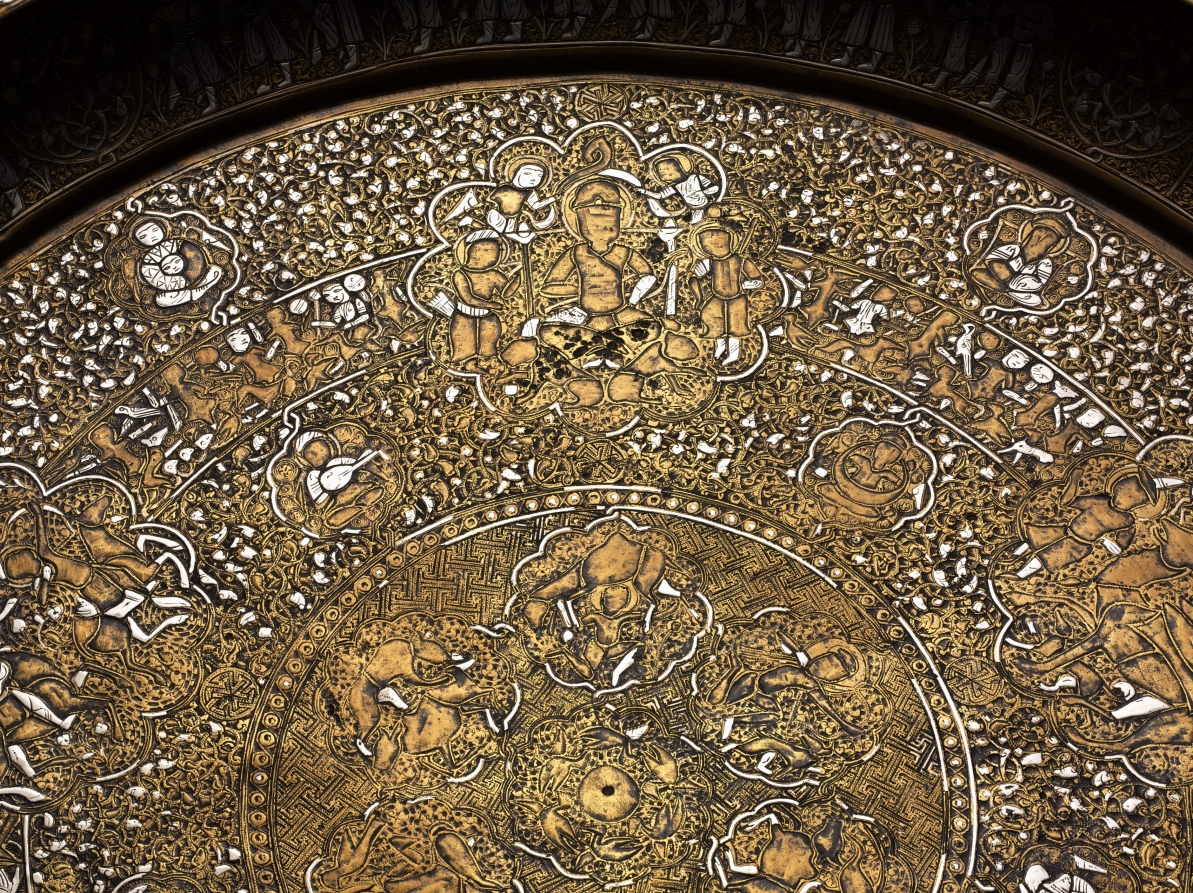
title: Tray Portraying Courtly Pleasures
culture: Syria, Ayyubid period (1171–1260)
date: 1240s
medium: sheet brass inlaid with silver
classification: Metalwork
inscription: The presence of ligatures in the narrow circular bands with interconnected human and animal figures suggests this may be a degenerate form of animated script. It is indecipherable.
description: This tray features images of courtly life interspersed with astronomical symbols. The scenes contained within large multilobed medallions display an enthroned prince with lions at his feet, a banquet, a hunt, dancers, and musicians. Contained within the concentric circles there are also references to solar and lunar motifs, including figures holding sunbursts and lunar crescents. This tray is made of a single sheet of brass and the silver inlay, which is best preserved on the tray’s inner curve, suggests its original brilliance.